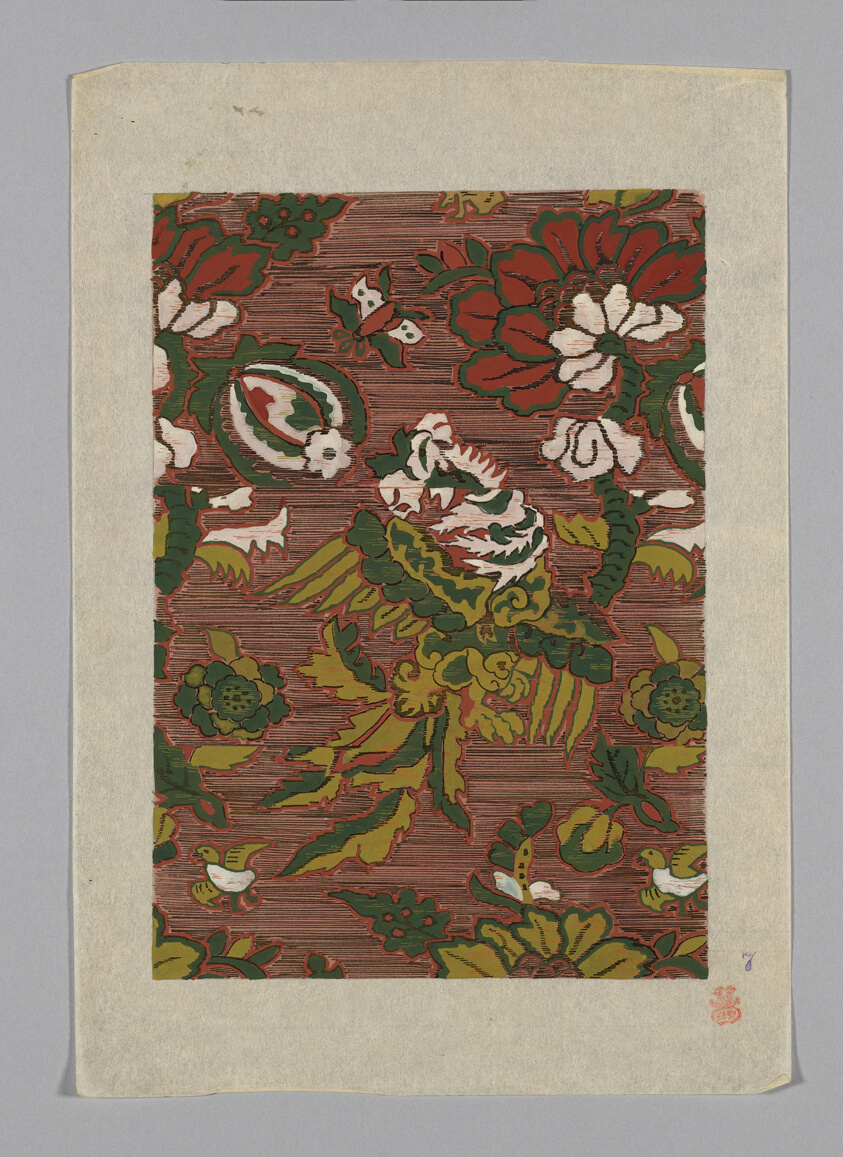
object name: Drawing and Watercolor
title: Design on Paper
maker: Japan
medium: Paper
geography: Japan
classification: textile; accessory - paper design; paper; watercolor